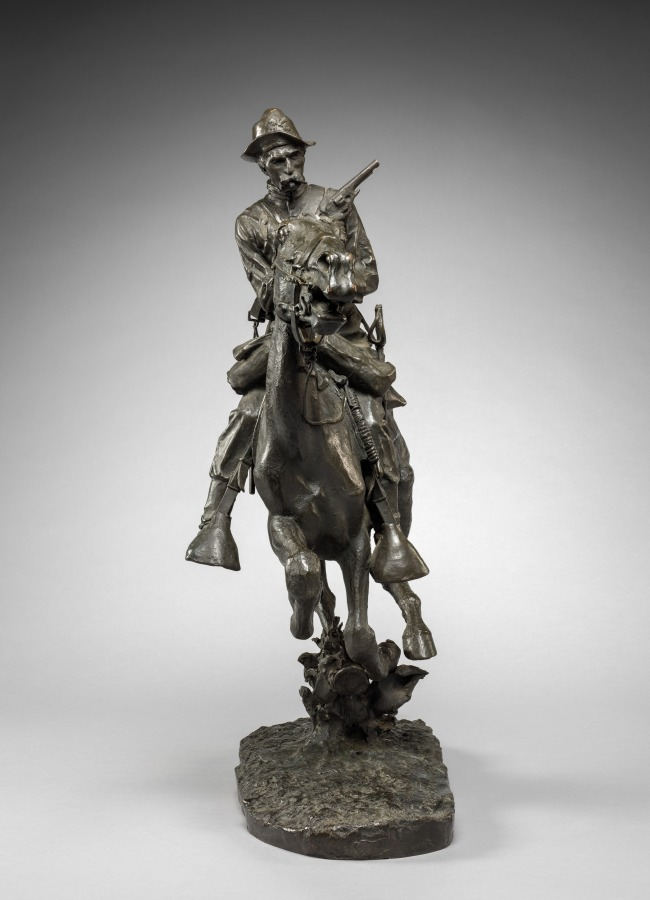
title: Trooper of the Plains-1868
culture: America, early 20th Century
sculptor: Frederic Remington (American, 1861–1909)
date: modeled 1908, cast c. 1911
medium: bronze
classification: Sculpture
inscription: Signed on top of base: Frederic Remington; Inscribed on side of base: Copyright by Frederick Remington, Roman Bronze Works, N.Y.; numbered underneath base: 3